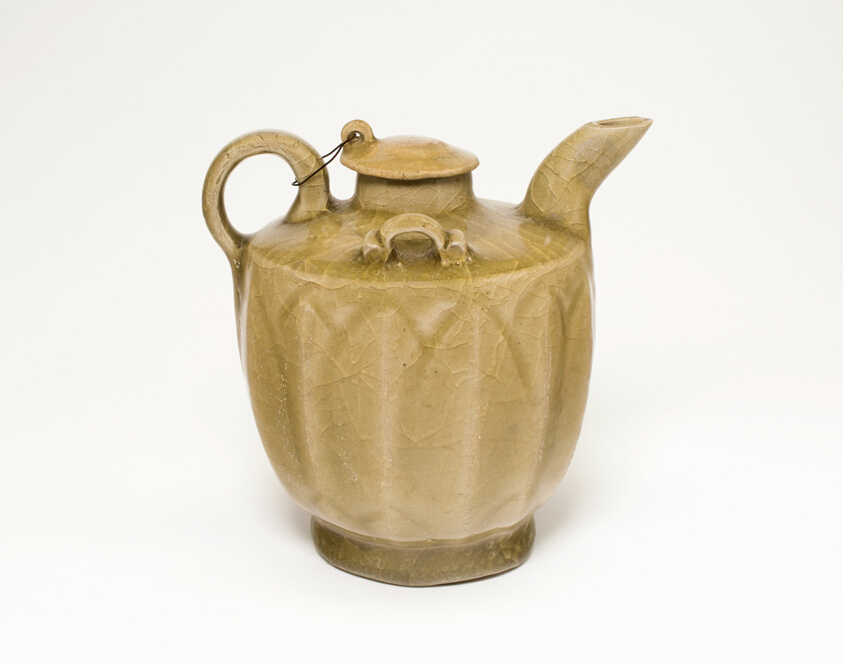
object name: Vessel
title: Covered Ewer with Upright Lotus Petals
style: Chinese (culture or style)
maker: China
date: Song dynasty (960–1279)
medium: Stoneware with underglaze molded, carved, and applied decoration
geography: China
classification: ewer (vessel); vessel; asian art; ceramics